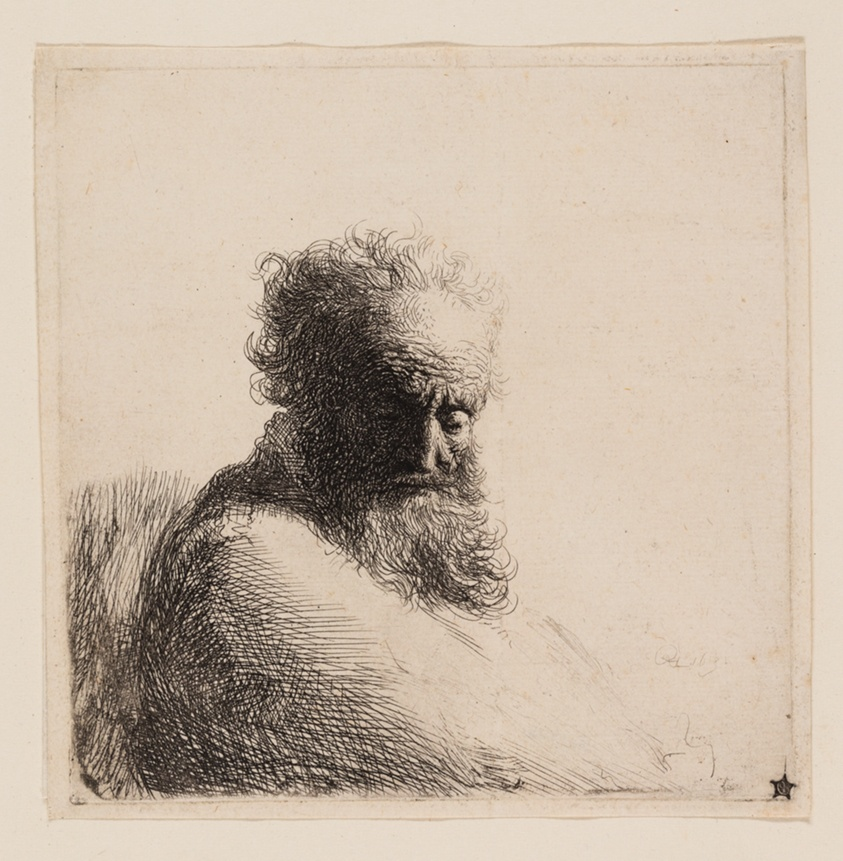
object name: Print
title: Bust of an Old Bearded Man, Looking Down, Three Quarters Right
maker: Rembrandt van Rijn (Dutch, 1606-1669)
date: 1631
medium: Etching on paper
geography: Holland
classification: etching; print; prints and drawing; paper